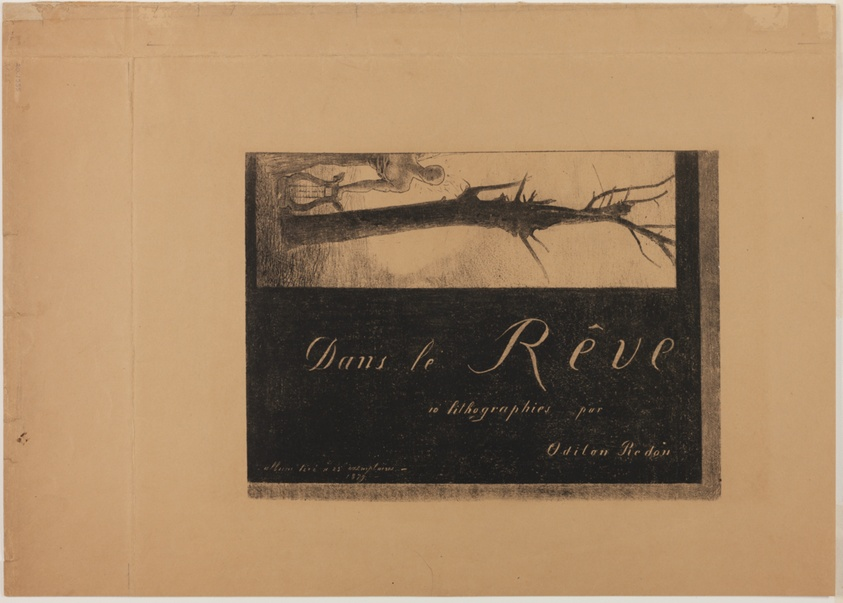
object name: Print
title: Cover-Frontispiece, from In Dreams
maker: Odilon Redon (French, 1840-1916)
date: 1879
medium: Lithograph on tan wove paper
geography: France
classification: lithograph; print; prints and drawing; paper